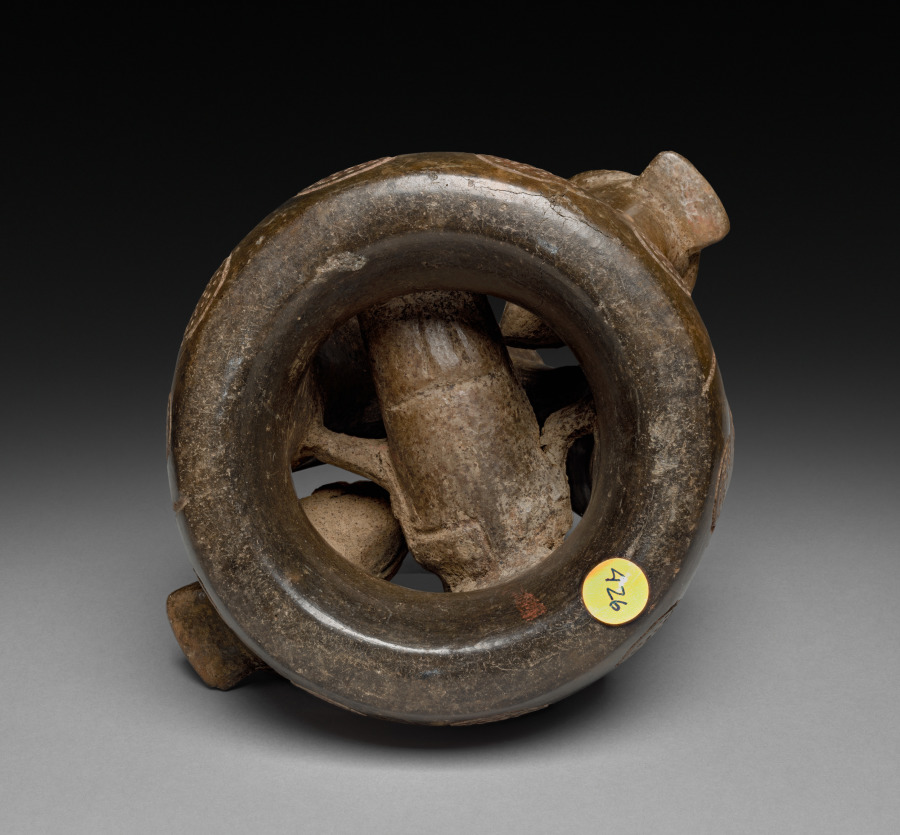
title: Vessel with Reclining Figure and Birds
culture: Andes, north coast, Cupisnique style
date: 2200–200 BCE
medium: Ceramic, pigment (cinnabar?)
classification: Ceramic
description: This ceramic vessel features a supine human being pecked by two birds that perch on the vessel’s doughnut-shaped chamber. The identity of the apparently mythical creature modeled in low relief on the sides of the stirrup-shaped spout is unknown. Little can be said about meaning beyond pointing out an obvious reference to death.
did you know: The stirrup-shaped form of the spout is common among Peruvian ceramics and unique to the ancient Americas.